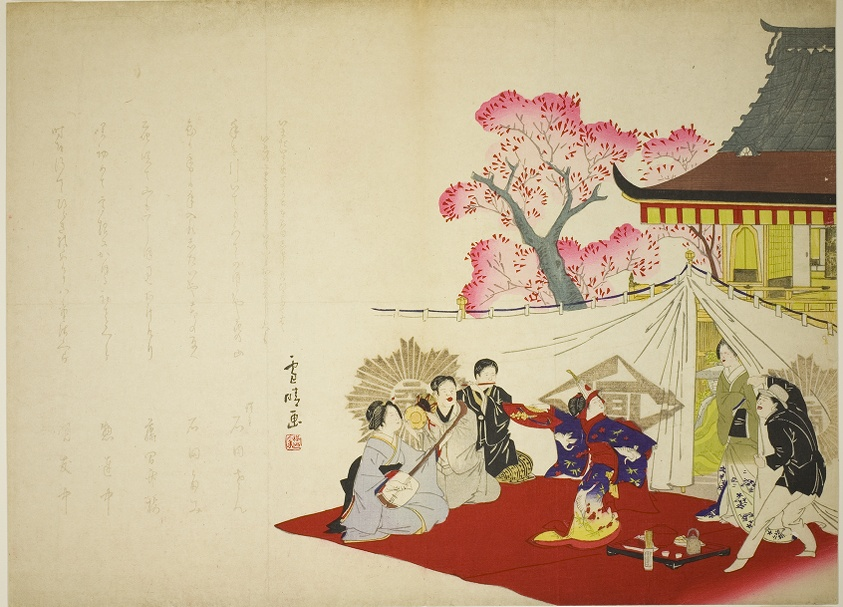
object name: Print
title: Meiji Dance Recital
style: Japanese (culture or style)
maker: Sessei (Japanese, active Meiji period (1868-1912))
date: 1880s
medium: Color woodblock print; surimono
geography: Japan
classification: woodblock print; print; asian art